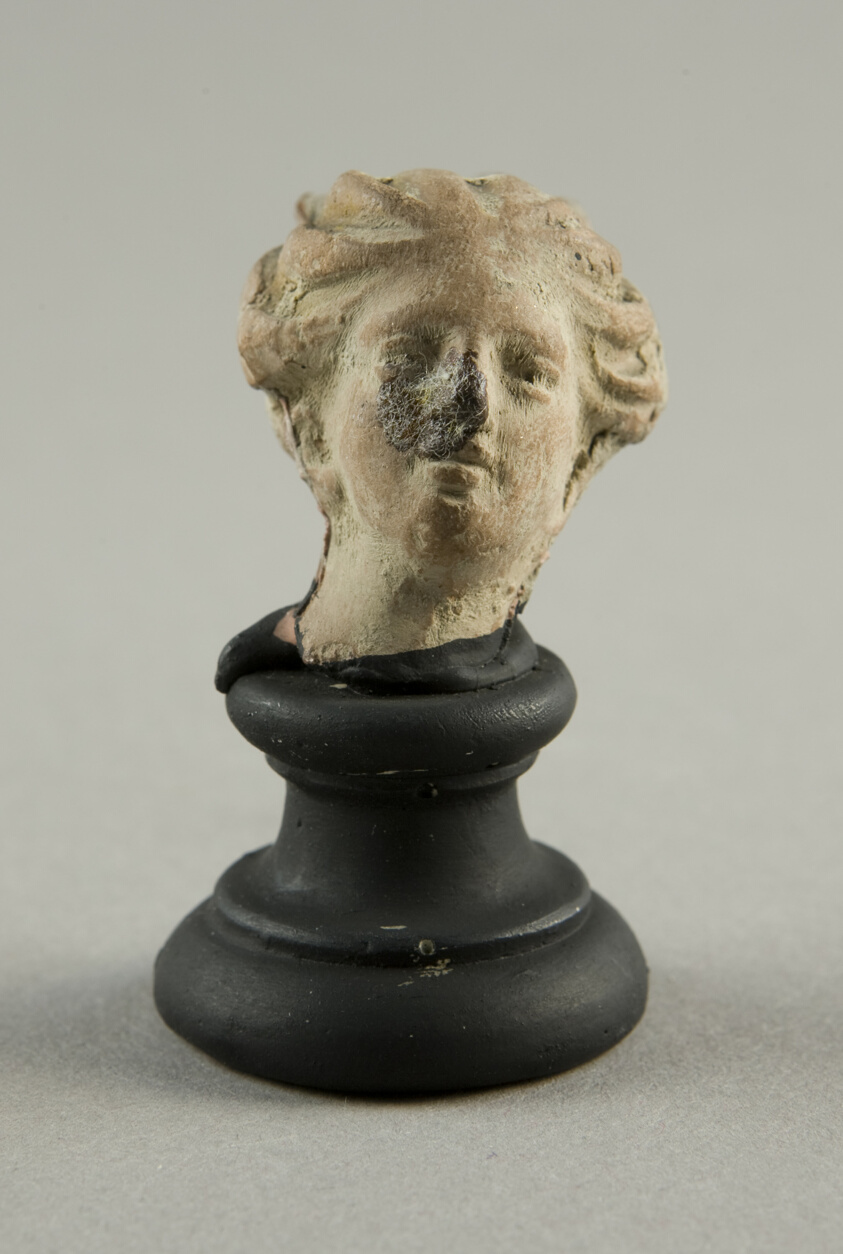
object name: Sculpture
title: Head of a Woman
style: greek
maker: Greek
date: 4th-3rd century BCE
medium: terracotta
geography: Greece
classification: earthenware; ceramics; sculpture; ancient art